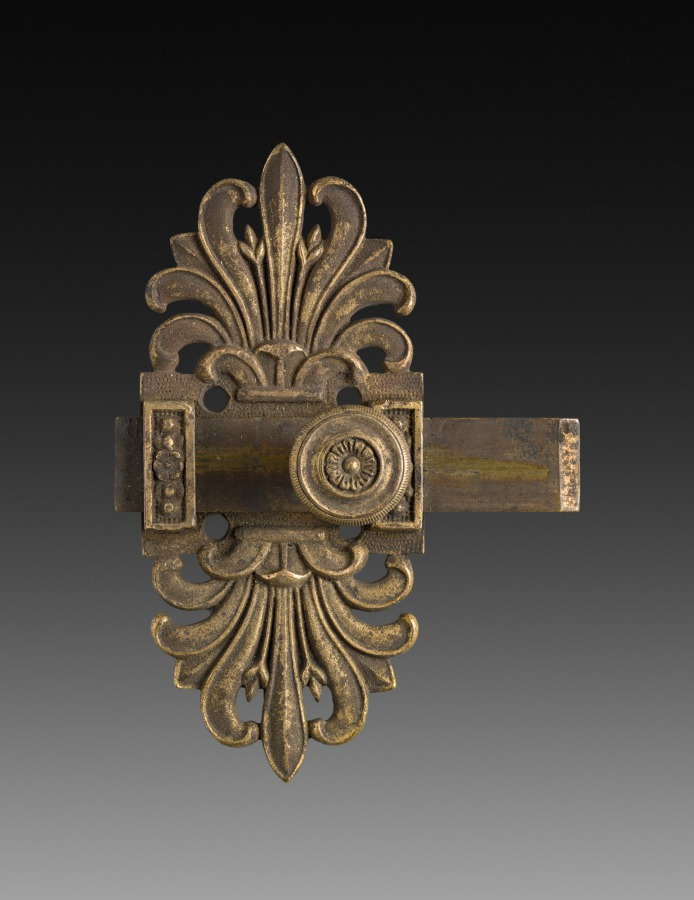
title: Ornamental Bolt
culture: France, early 19th century, Empire Style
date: c. 1800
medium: gilt bronze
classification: Metalwork